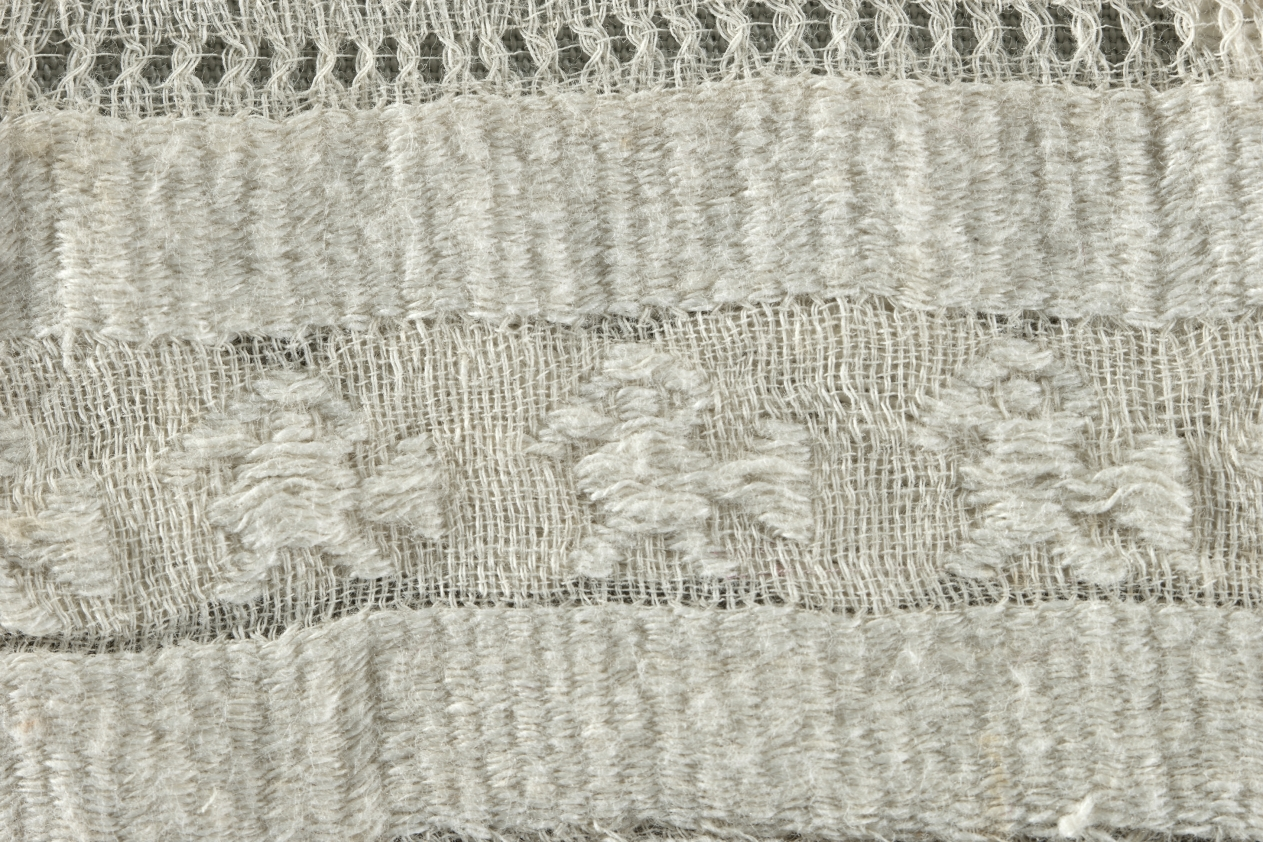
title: Loincloth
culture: Peru, North Coast, Chimú style, 1200–1460s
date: 1425–1500 (radiocarbon date, 92.3% probability)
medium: cotton; plain weave, brocaded and complex alternating gauze with 5 shots of plain weave between gauze shots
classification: Garment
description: Loincloths were basic men’s wear in ancient Peru. But the extraordinary size of some examples—this one is about eight feet long, unfolded—makes it difficult to know how they were worn, except that they were tied around the waist with the decorated panels hanging at the front and back of the body. The appearance may have been that of a billowing skirt.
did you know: This loincloth is huge!